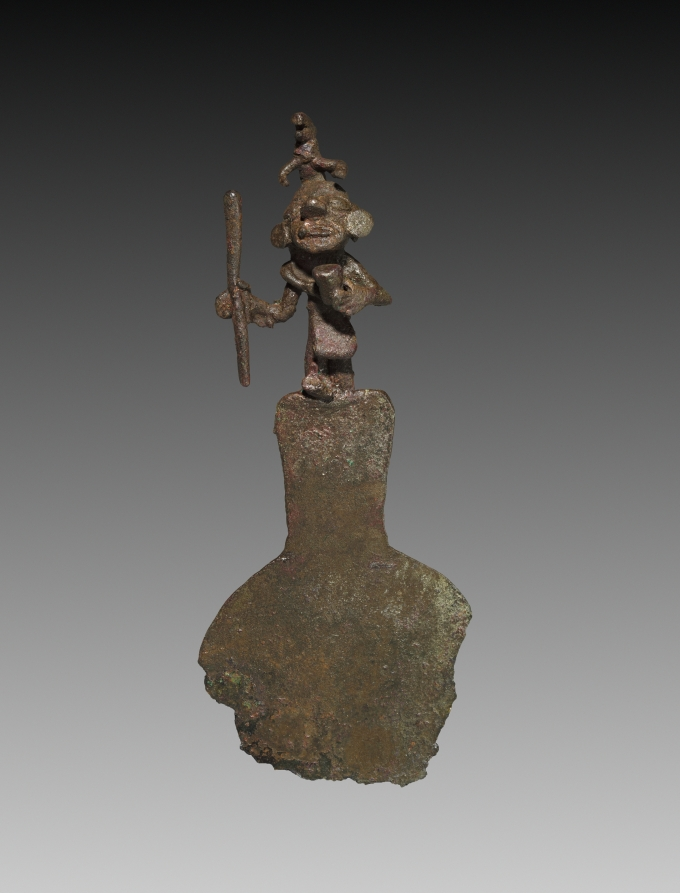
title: Knife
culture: Peru, Inca Culture, 15th-16th century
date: 1400s-1500s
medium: bronze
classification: Metalwork